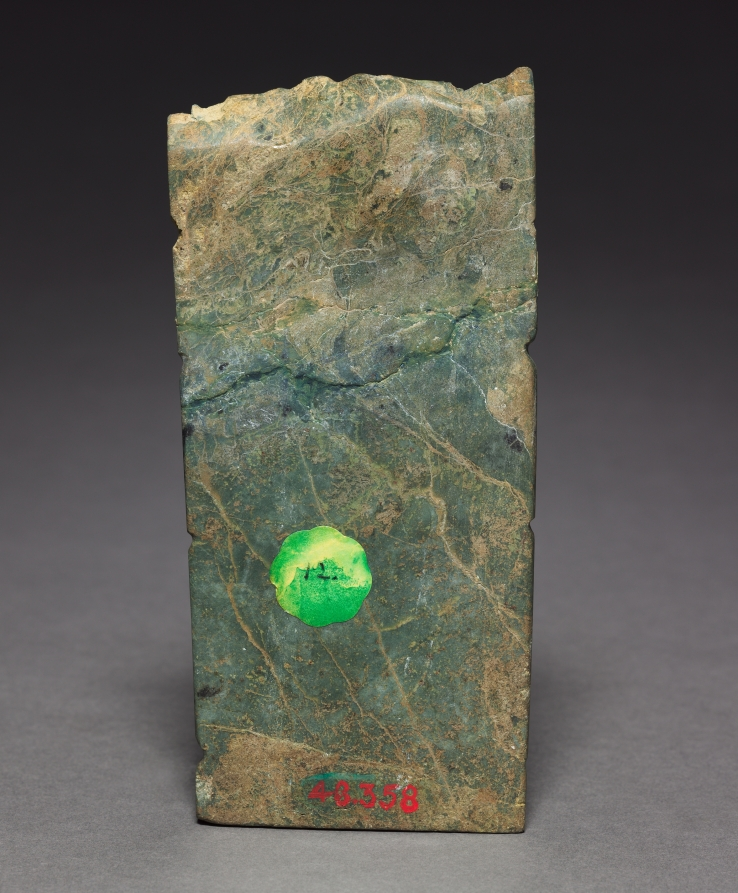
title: Pendant Plaque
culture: Mexico, Oaxaca, Zapotec, 6th-8th Century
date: c. 500–700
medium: jade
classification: Jade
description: This exceptionally large and elaborate plaque depicts a human being costumed as a jaguar, with claws on hands and feet, and a jaguar-head helmet. At the Zapotec capital, Monte Albán, dignitaries in feline garb are portrayed in several relief sculptures. A pendant similar to this one was found in an architectural dedicatory offering deposit at Monte Albán.